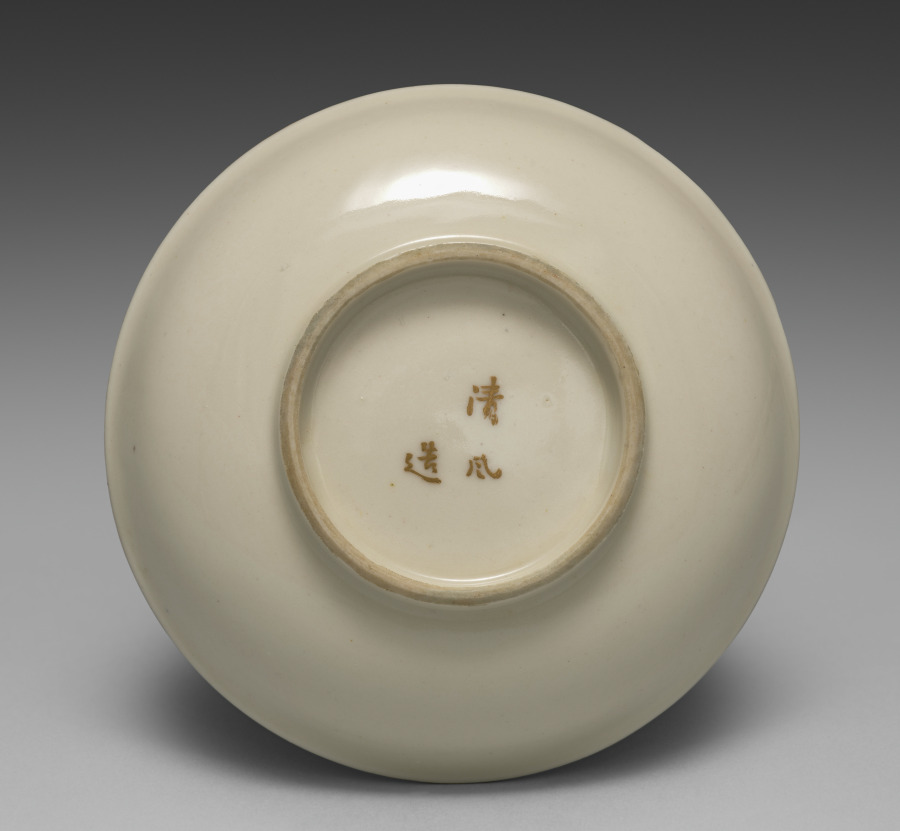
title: Small Dish from Dining Set with Plum Blossoms and Cracked-Ice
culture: Japan, Meiji period (1868–1912)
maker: Seifū Yohei II (Japanese, 1844–1878)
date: c. 1875–78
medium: Porcelain with molded designs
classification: Ceramic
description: Each item in this set has a delicate low-relief design of flowering plum branches over scattered, intersecting lines meant to resemble the cracked-ice surface of a frozen body of water and is signed on the base in gold pigment. While Yohei II produced many fine works in underglaze blue, like those produced by Kiyomizu Shichibei, he also made works in quite different styles later in his career, from the early 1870 s. In 1873, he was appointed purveyor to the Industrial Center of Kyoto Prefecture, a designation associated with Kyoto’s efforts to reach an international market through the port of Kobe; and from 1875 until his death, he was involved in national-level projects to present Japanese ceramics across the world. It was during this period that Yohei III was apprenticed to Yohei II, and it has been suggested that this set may in fact be an early example of Yohei III’s work, which he signed with his teacher’s name. Decorated with flowers resembling Japanese textile motifs, the set calls to mind the design of Yohei II’s pair of vases with plum blossoms in the Victoria and Albert Museum. Here, the elaborate trees created for a formal public exhibition setting have been translated into the approachable blossoms of the genteel domestic environment. While the designs are consistent across the pieces, each raised flower petal and pistil and each incised line in the ice was done by hand, so the cups, bowls, and dishes are similar yet unique. The bottoms of two boxes once identified the set’s owner, but the information has been deliberately obscured with black ink. However, inscriptions still visible appear to indicate two occasions, once at the end of July 1886 , and once again in June 1916 , when parts of the set were requested from Hokura in Niigata Prefecture. The location corresponds to a neighborhood in the present-day city of Jōetsu. The surname Tsuji 辻 also appears on a paper tag affixed to one of the box cloths. Future research may possibly reveal more about their provenance. A vase by Yohei III in a private collection combines the formal grandeur of the Yohei II vases in the Victoria and Albert Museum with the gentler design of this dining set, placing flowering plum trees against soft, scalloped-edge clouds resembling those in golden screens.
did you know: The dining wares have a creamy white coloration that the four boxes containing them identify as Korean in style.